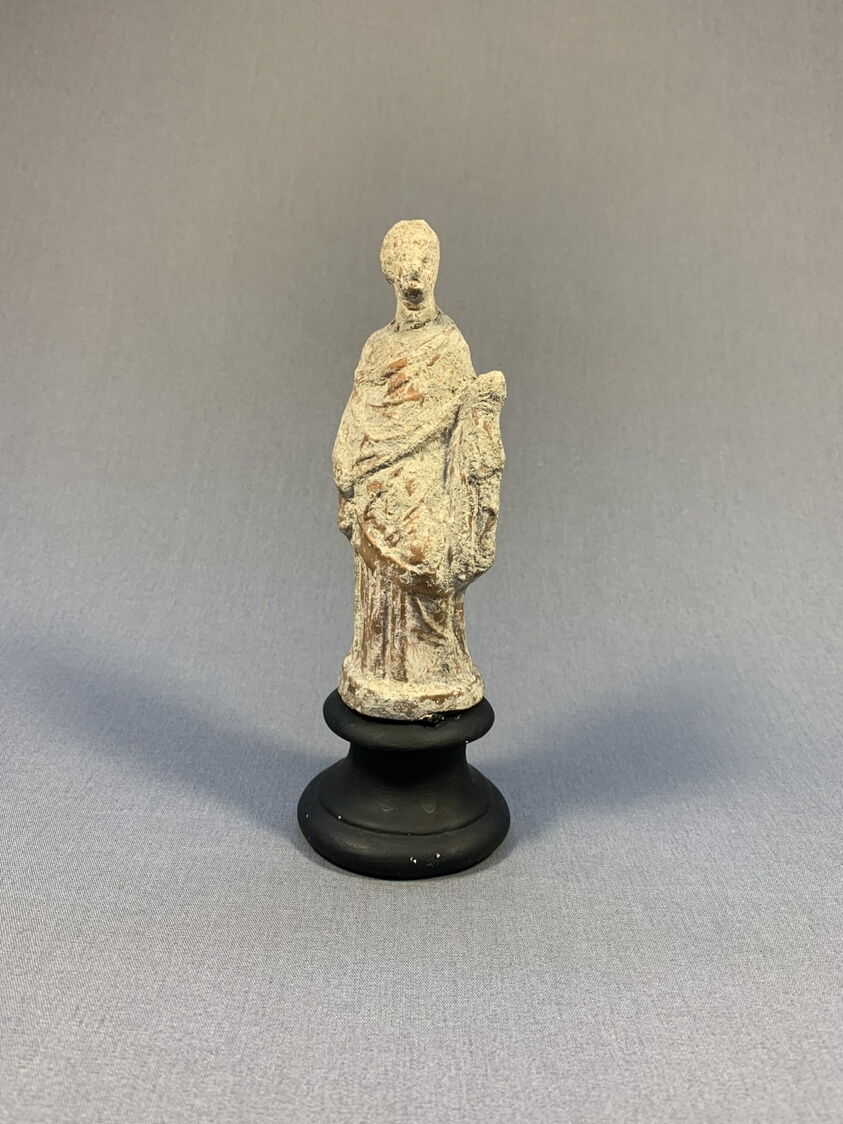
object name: Sculpture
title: Figurine of a Standing woman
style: greek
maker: Greek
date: 4th-3rd century BCE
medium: terracotta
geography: Greece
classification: earthenware; ceramics; sculpture; ancient art